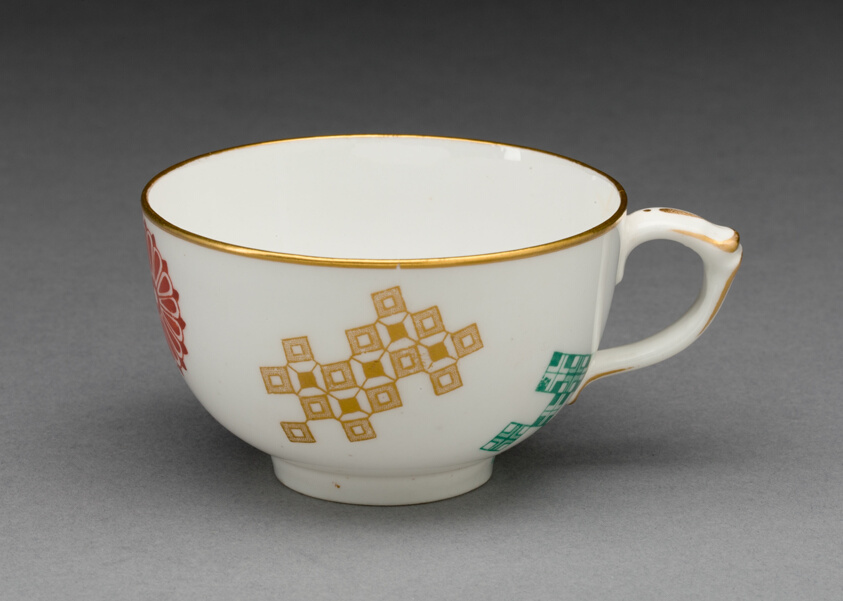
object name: Ceramics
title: Cup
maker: Worcester Porcelain Factory (Worcester Royal Porcelain Company, 1862-1958); Worcester, England, founded 1751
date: 1878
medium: Soft-paste porcelain, polychrome enamels and gilding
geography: Worcester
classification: drinking vessel; teaware; porcelain; european decorative arts; ceramics